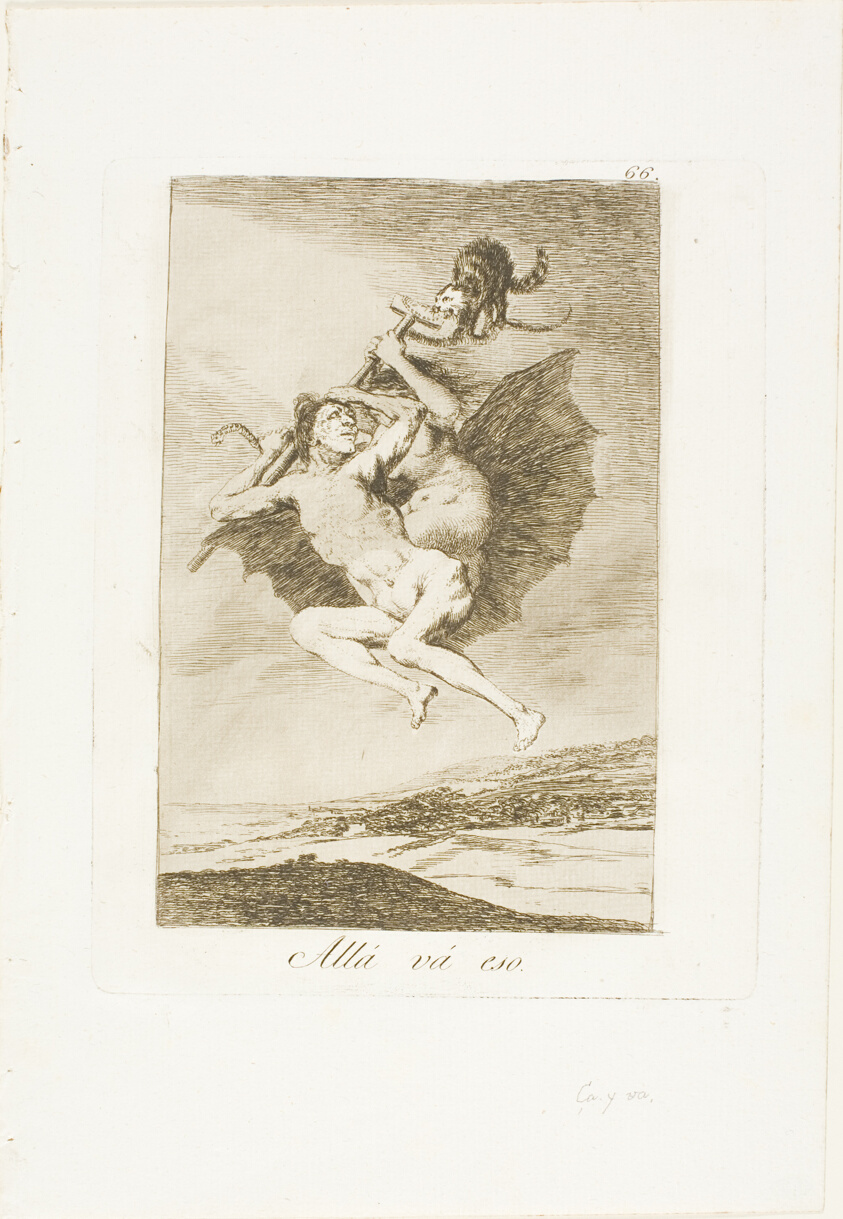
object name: Print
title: There it Goes, plate 66 from Los Caprichos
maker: Francisco José de Goya y Lucientes (Spanish, 1746-1828)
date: 1797/99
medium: Etching and aquatint on ivory laid paper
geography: Spain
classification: etching; print; prints and drawing